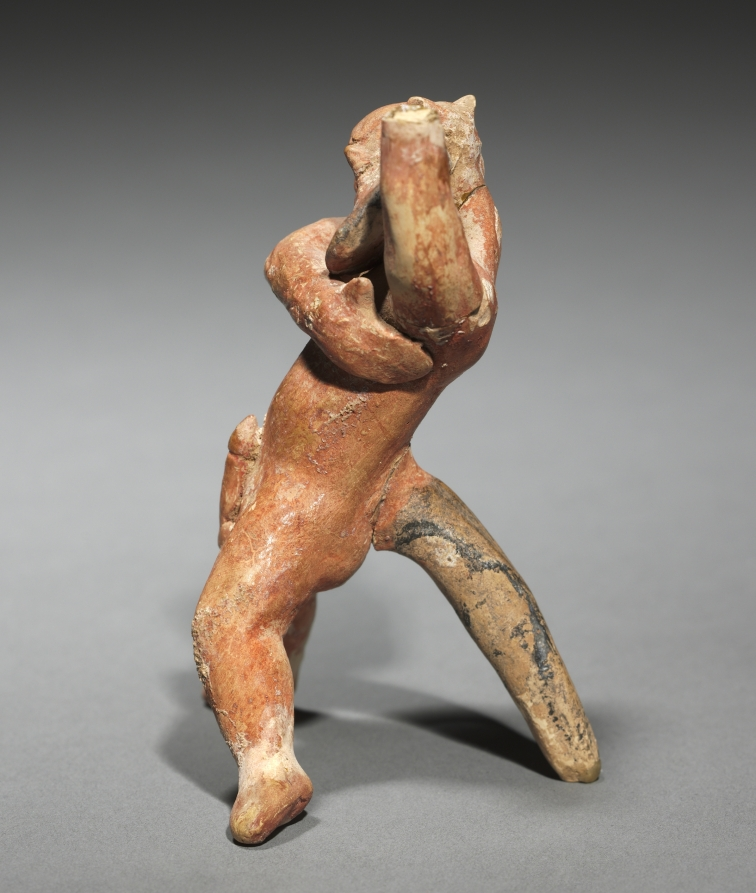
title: Dancing Satyr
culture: Greece, Boeotia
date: 500–475 BCE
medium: painted terracotta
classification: Sculpture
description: Part man and part beast, satyrs were mythical woodland creatures. In art, they were depicted with the ears and tail of a goat or horse, sometimes with hooves, and in a high state of sexual arousal. Satyrs often accompanied Dionysus, the god of wine, in his drinking bouts and other escapades. These three probably once decorated the rim of a large punch-bowl–shaped vessel for serving wine.